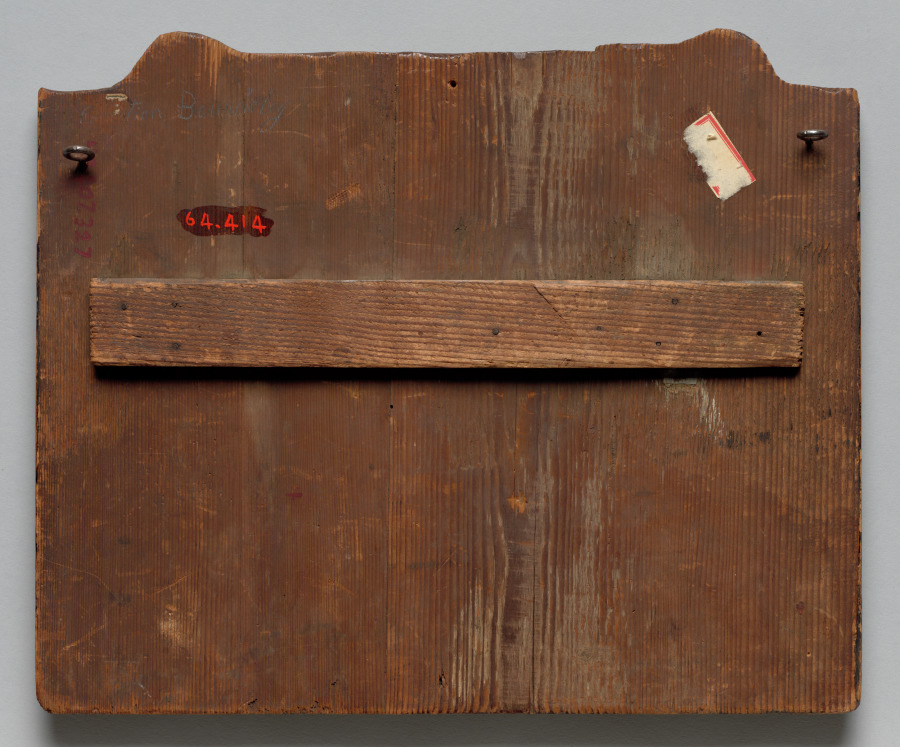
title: Model for the Lower Part of a Gilt Bronze Furniture Mount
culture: France, 19th century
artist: firm of Louis Auguste Alfred Beurdeley (French, 1808–1882)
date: c. 1867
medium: red wax relief on wood panel painted blue green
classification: Furniture and woodwork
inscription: Inscribed on rear in pencil: "---tion Beurdeley"; and in red paint: "42(.?) 207.327."